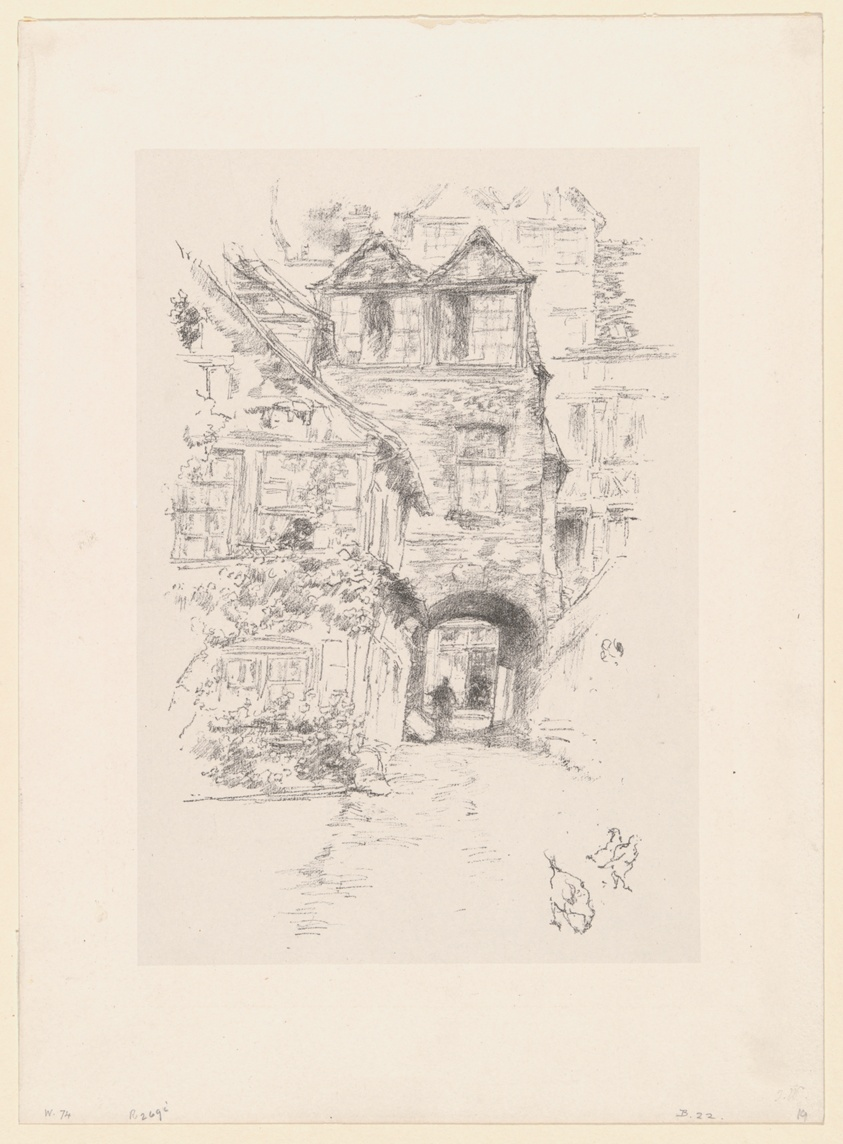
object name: Print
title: The Priest's House, Rouen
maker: James McNeill Whistler (American, 1834-1903)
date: 1894/95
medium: Transfer lithograph in black with stumping and scraping, on cream wove Japanese vellum laid down on a heavy backing sheet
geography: United States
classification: transfer lithograph; lithograph; print; prints and drawing